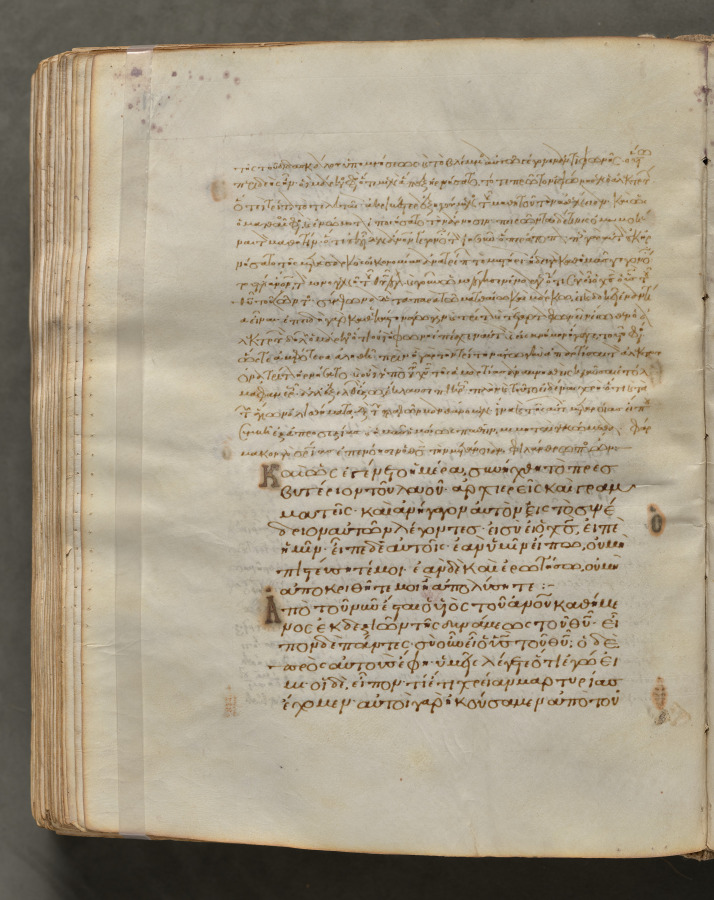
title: Text, folio 312 (verso), from a Gospel Book with Commentaries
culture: Byzantium, Constantinople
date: c. 1000–1100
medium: ink, tempera, and gold on vellum; leather binding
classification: Bound Volume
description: Each of the four gospels in this book opens on a page with brilliantly illuminated borders depicting the author of the text as well as birds—principally peacocks, symbols of the immortality of the soul—and fountains, representing the fountain of life and the salvation of the soul. This volume consists of 428 leaves with texts in Greek. Its level of sophistication suggests that it was probably written and decorated in a monastery in Constantinople.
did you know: Gospel books were carried in procession through Byzantine churches.